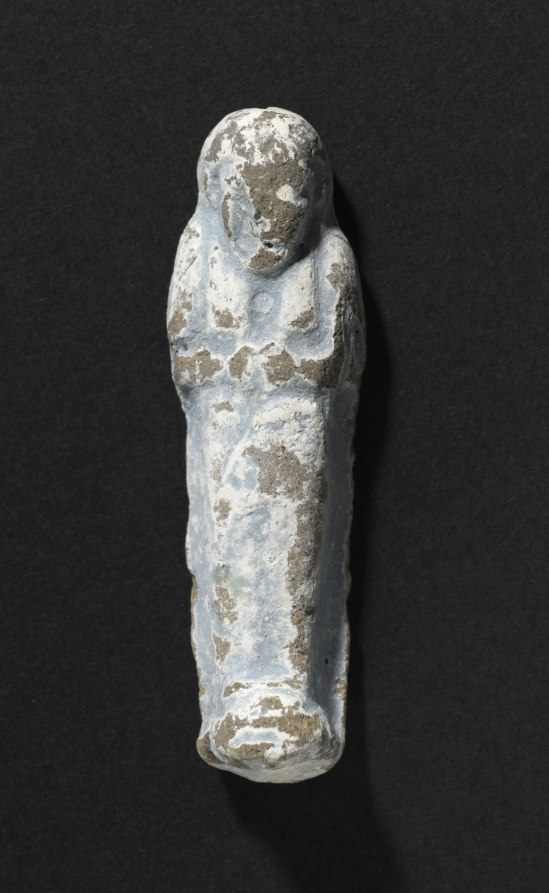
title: Shawabty of Ditamenpaankh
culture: Egypt, Late period (715–332 BCE), Dynasty 25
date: 715–656 BCE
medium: terracotta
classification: Funerary Equipment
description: High demand for shawabtys in the Late Period, a time when as many as 400 or more shawabtys were placed in the tomb with the deceased, gave rise to a specialized container for storing them: the shawabty box. This example is inscribed for the lady of the house, Ditamenpaankh, and was probably one of a pair originally made for her. The single-masted boat on the box's lid is perhaps an allusion to the pilgrimage of the deceased to the holy city of Abydos, the cult city of Osiris, king of the dead. The shawabtys inside are crude, mass-produced examples cast in an open mold. Made of terracotta, their blue paint imitates more costly shawabtys made of faience. As for the shawabty spell, it has been removed from its traditional location on the shawabty's front and relocated onto the sides of box, where it needed only to be written once, thus expediting production.